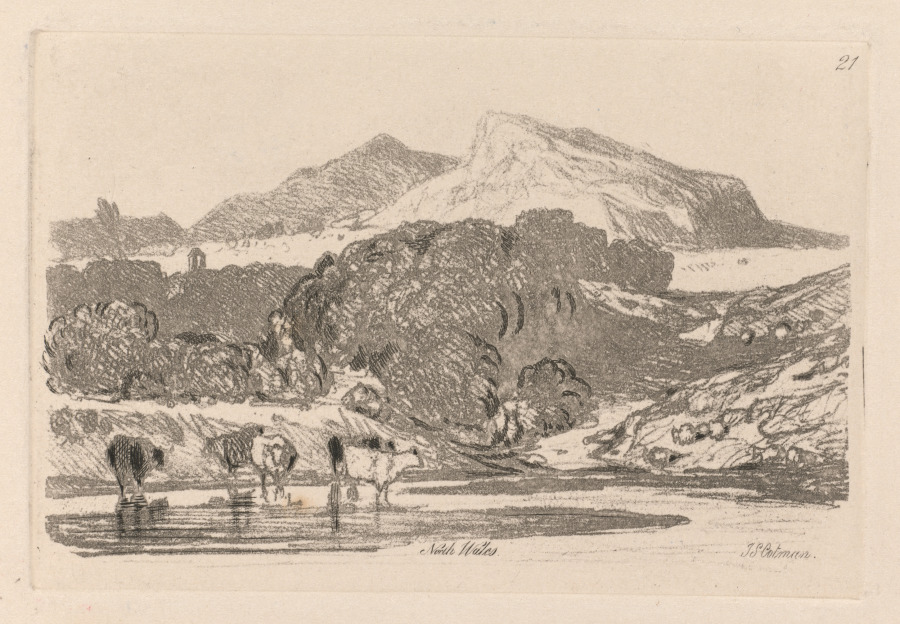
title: Liber Studiorum: Plate 21, View in North Wales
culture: England, 19th century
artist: John Sell Cotman (British, 1782–1842)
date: 1838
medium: softground etching, from a bound volume containing 48 plates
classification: Bound Volume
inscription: In plate, within image, upper right: 21; in plate, below image: North Wales JS Cotman